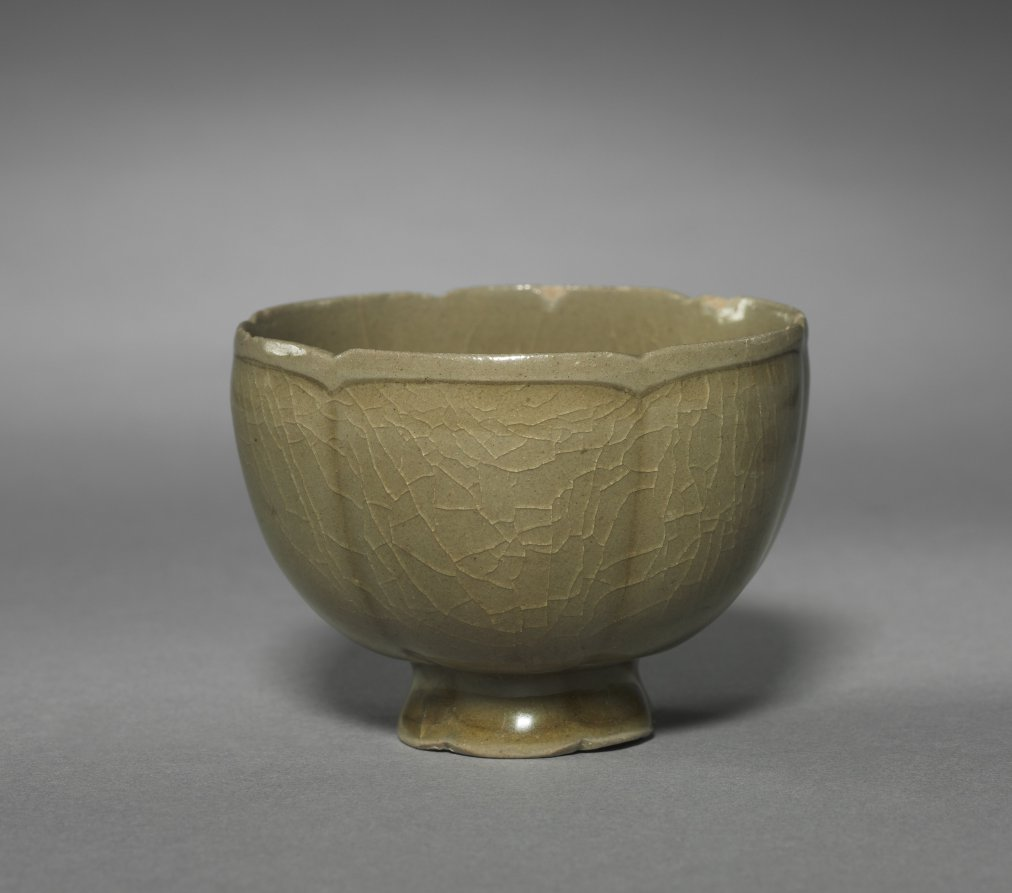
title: Floral-shaped Cup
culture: Korea, Goryeo dynasty (918–1392)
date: 1100s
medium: pottery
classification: Ceramic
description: As early as the seventh century, the practice of drinking tea became an important part of elite culture in Korea. In enjoying teas, elites commissioned a variety of types of utensils and vessels including this delicate-looking cup, not only to make their tea-drinking experience more exciting, but also to show their refined taste. This cup is coupled with the cup stand (1921.617).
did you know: Elites of the Goryeo period are known for their love of drinking tea and wine. This type of delicate-looking cup not only made their drinking experience more enjoyable, but also showed their refined taste.